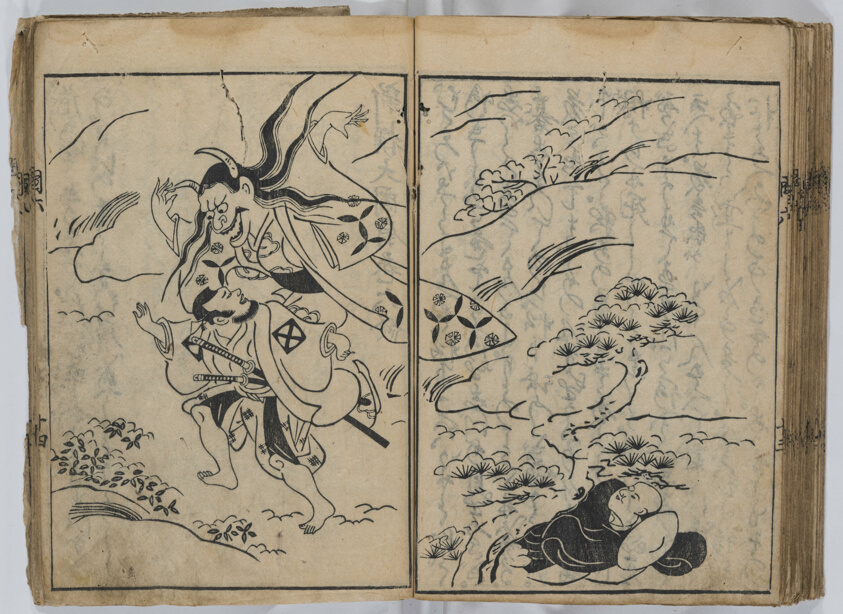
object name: Book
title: A New Selection of Big Fans (Shinsen O-Uchiwa)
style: Japanese (culture or style)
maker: Okumura Masanobu 奥村 政信; Japanese, 1686-1764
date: Edo period (1615–1868), n.d.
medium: Woodblock printed book, sumizuri-e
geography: Japan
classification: book; woodblock